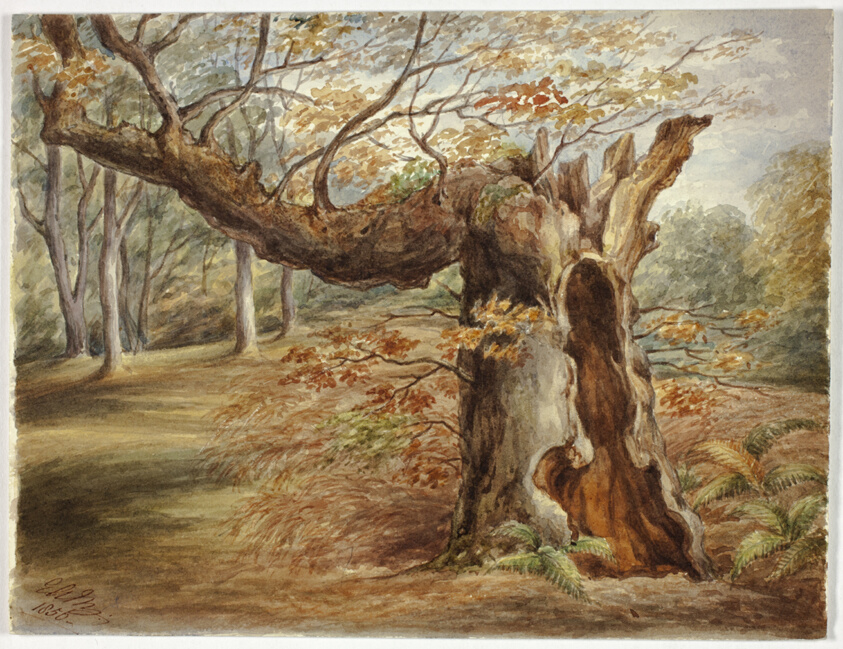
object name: Drawing and Watercolor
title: Rotting Tree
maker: Elizabeth Murray (English, c. 1815-1882)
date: 1850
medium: Watercolor over graphite on ivory wove paper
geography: England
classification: watercolor; drawings (visual works); prints and drawing